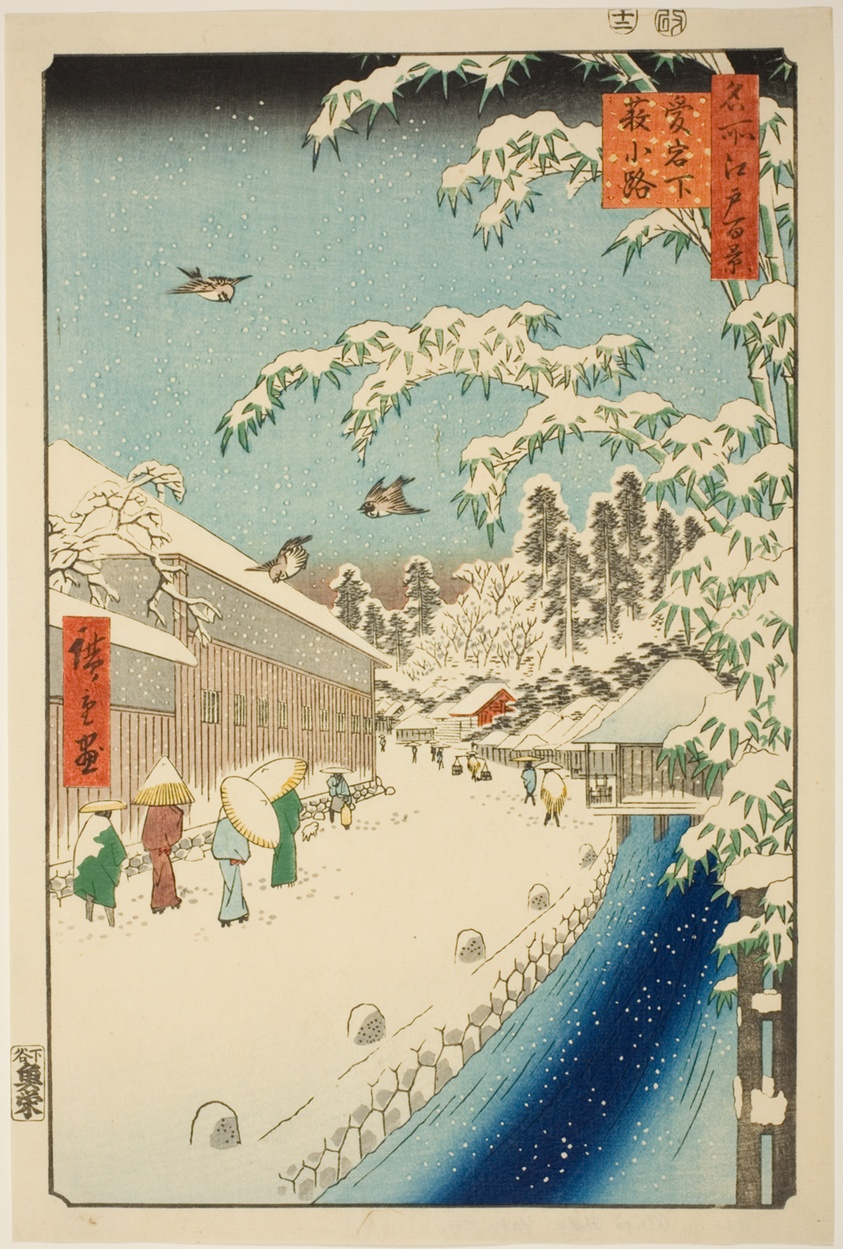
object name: Print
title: Yabu Street at the foot of Atago Hill (Atagoshita yabukoji), from the series "One Hundred Famous Views of Edo (Meisho Edo hyakkei)"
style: Japanese (culture or style)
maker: Utagawa Hiroshige 歌川 広重; Japanese, 1797–1858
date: 1857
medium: Color woodblock print; oban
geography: Japan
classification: woodblock print; print; asian art